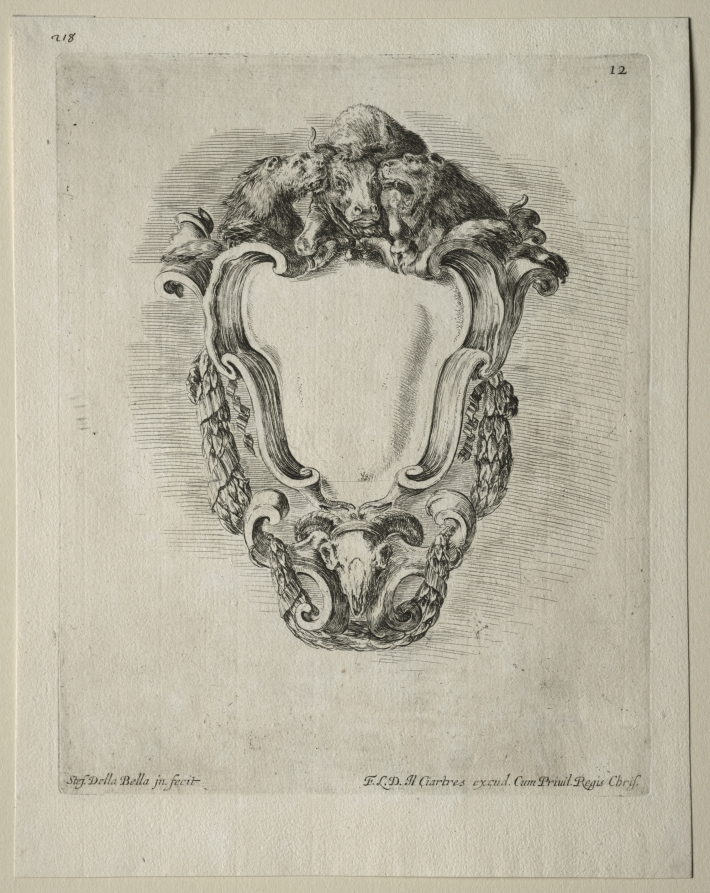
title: Collection of Various Caprices and New Designs of Cartouches and Ornaments: No 12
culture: Italy, 17th century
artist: Stefano Della Bella (Italian, 1610–1664)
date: 1646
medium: etching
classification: Print